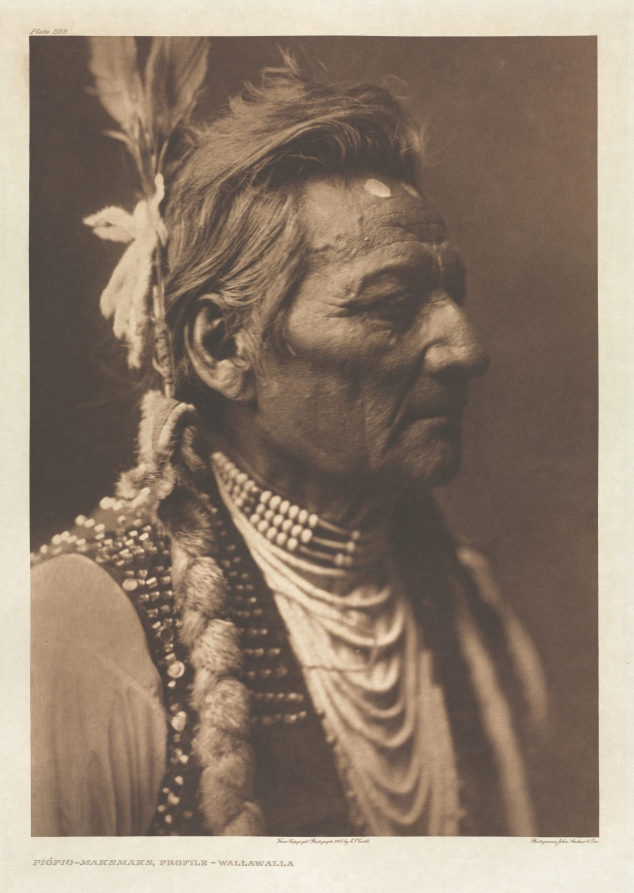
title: Portfolio VIII, Plate 268: Piópio-Maksmaks, Profile - Wallawalla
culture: America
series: The North American Indian: being a series of Portfolios picturing and describing the Indians of the United States, the Dominion of Canada, and Alaska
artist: Edward S. Curtis (American, 1868–1952)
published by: The University Press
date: 1905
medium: photogravure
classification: Portfolio